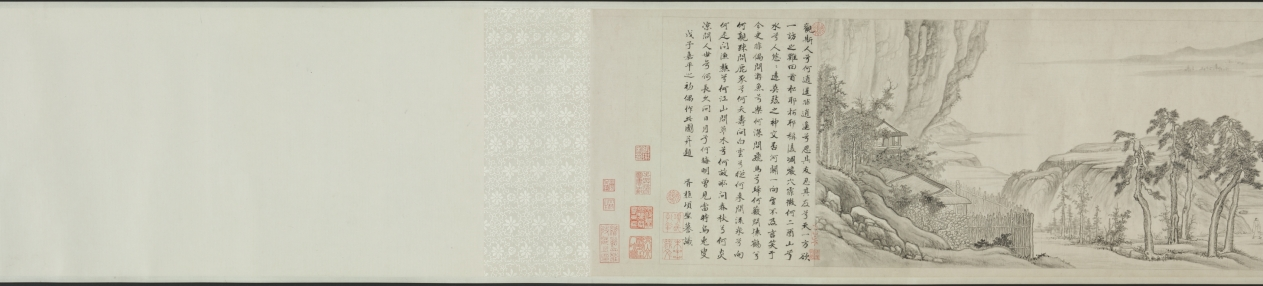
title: Meditative Visit to a Mountain Retreat: In Picture and in Words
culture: China, Ming dynasty (1368–1644)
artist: Xiang Shengmo (Chinese, 1597–1658)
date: 1648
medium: handscroll; ink on paper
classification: Painting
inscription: Artist's title and 3 seals (in front of painting): [title] Meditative Visit to a Mountain Retreat: In Picture and in Words 巖栖思訪圖詠 [3 seals] Tian lai ge zhong wen sun 天籟閣中文孫; Xiang shi kong zhang zui xin han mo 項氏孔彰醉心翰墨; Qing fu yuan zhong di yi miao ye 清福緣中第一妙業.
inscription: [印] 兔烏叟; 考古正今. 觀斯人兮何逍遙，非逍遙兮思其友。 思其友兮天一方，欲一訪之難回首。 松耶柏耶稱後凋，巖穴霏微何二酉。 山兮水兮人悠悠，遠莫致之神交否？ 河關一向望不及，言笑于今更非偶。 問游魚兮樂何深？問飛鳥兮歸何藪？ 問猿鶴兮何親疎？問鹿豕兮何夭壽？ 問白雲兮從何來？問流泉兮向何走？ 問漁樵兮何江山？問草木兮何畝畎？ 問春秋兮何炎涼？問世人兮何長久？ 問日月兮何晦明？曾見當時烏兔叟？ 戊子嘉平之初偶作此圖并題。 胥樵項聖謩識。 [印] 兔烏叟; 項氏孔彰; 未喪斯文.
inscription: 13 additional seals: 4 of Tang Zuomei 唐作梅 (late 18th–19th century); 3 of Zhang Baixi 張百熙 (1847–1907); 4 of Zhang Heng 張珩 (1915–1963); 2 unidentified.